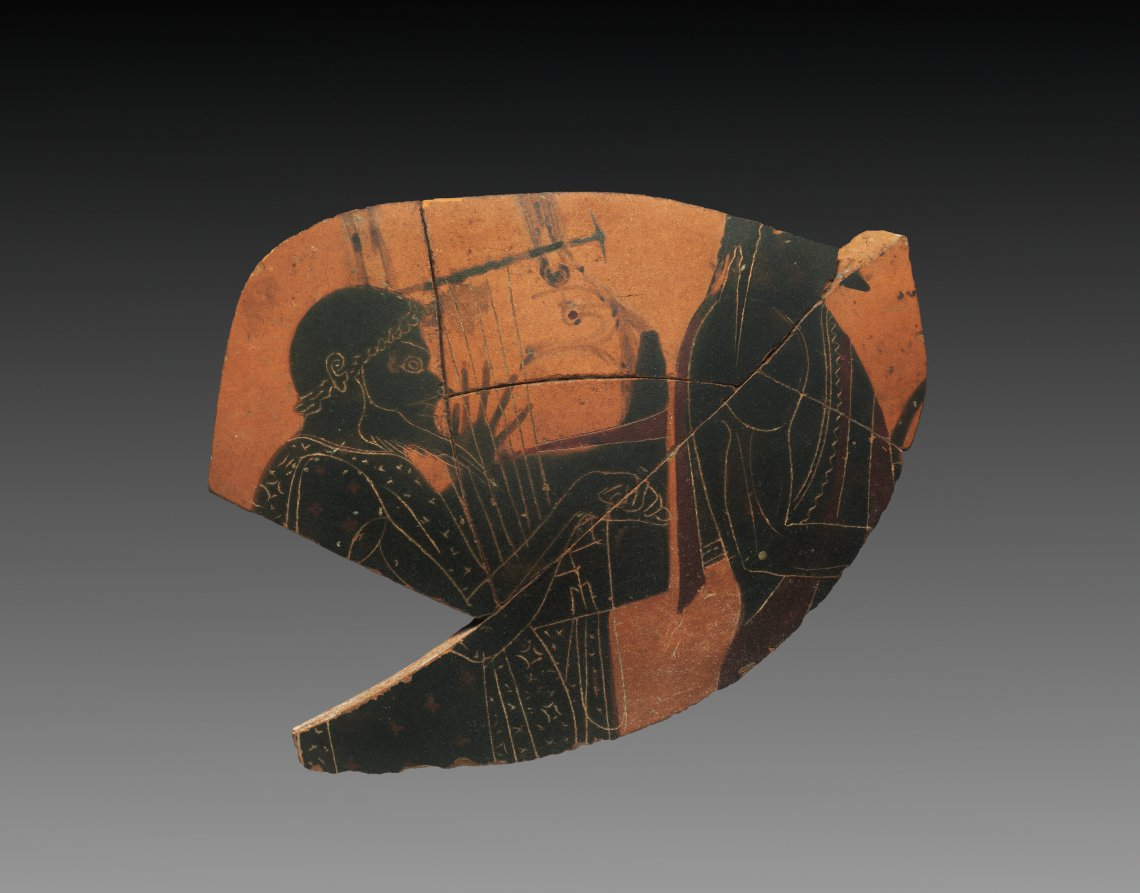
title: Fragment from Black-Figure Amphora (Storage Vessel): Musicians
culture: Greek, Attic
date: c. 530–520 BCE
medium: ceramic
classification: Ceramic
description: Two musicians appear on this amphora fragment. The first, long-haired and bearded, holds an instrument that is mostly lost, but with a curving arm that identifies it as a lyre, probably of the standard (chelys, or tortoiseshell) type. His bearded companion, with curly hair and an ornate robe, plays a concert kithara, a more elaborate seven-stringed instrument.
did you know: Vase painters depict four different kinds of lyres, or stringed musical instruments.